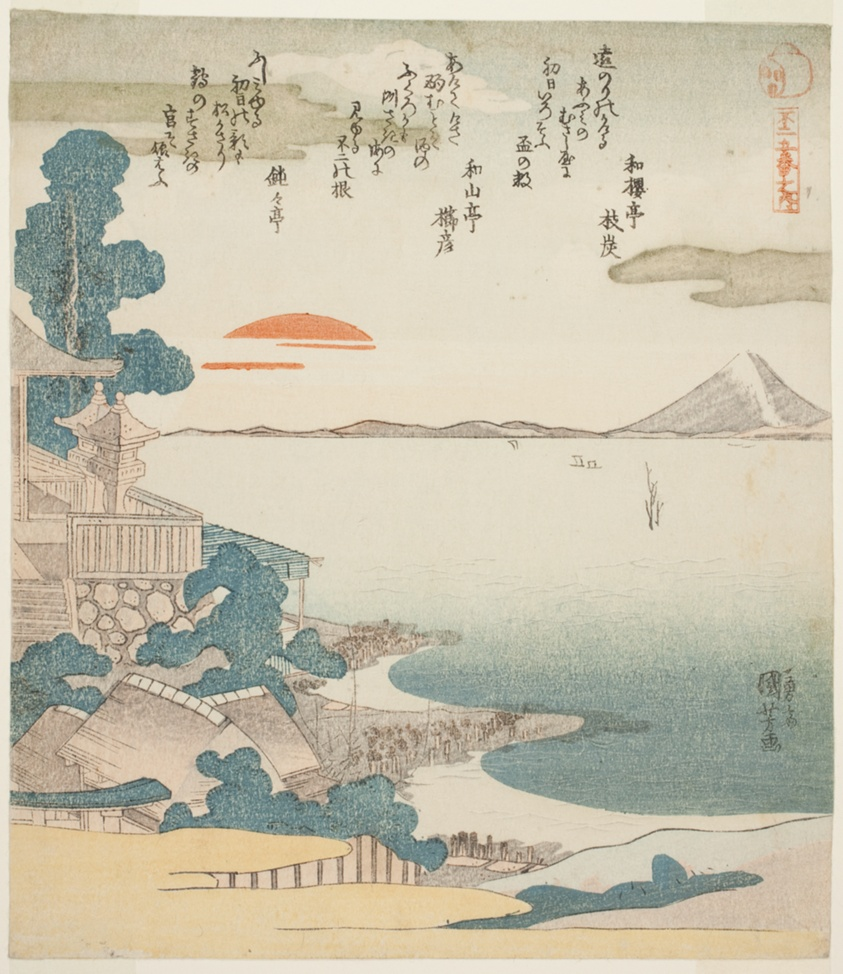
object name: Print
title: Dawn over Mout Fuji and Susaki, from the series "Five Views of Mount Fuji (Fuji goban no uchi)"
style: Japanese (culture or style)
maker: Utagawa Kuniyoshi (Japanese, 1787-1861)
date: c. 1827/29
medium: Color woodblock print; shikishiban surimono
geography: Japan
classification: woodblock print; print; asian art